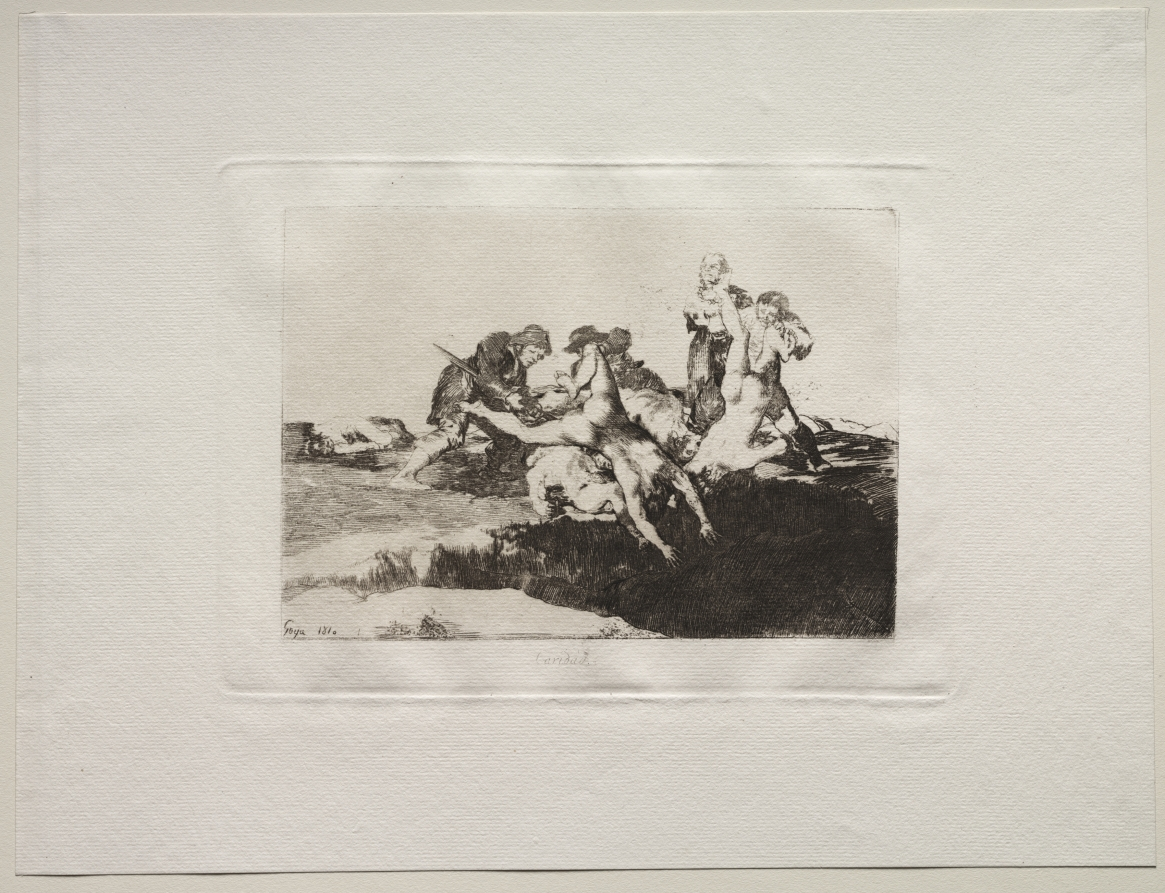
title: The Horrors of War: Charity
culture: Spain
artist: Francisco de Goya (Spanish, 1746–1828)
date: 1810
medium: etching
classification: Print